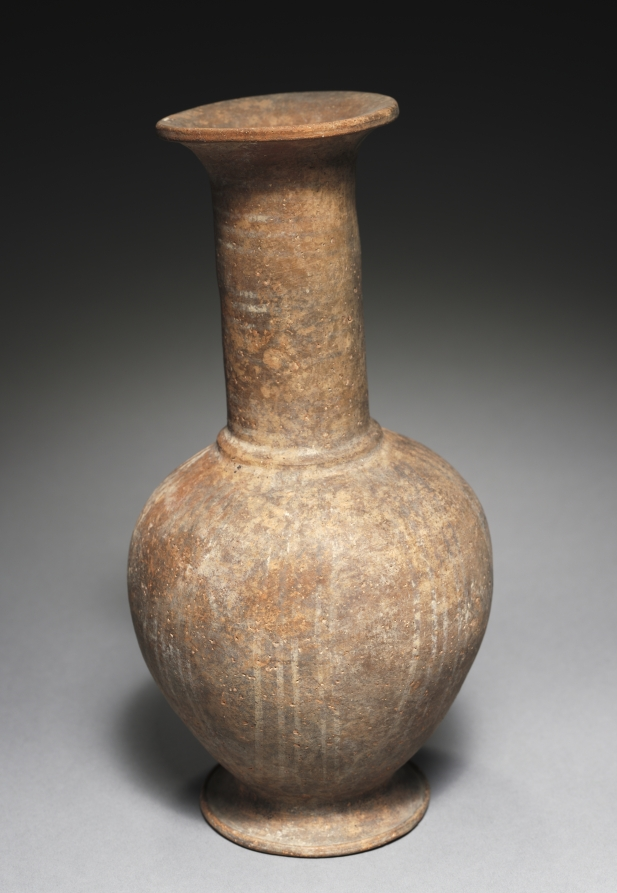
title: Jug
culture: Cyprus, late Cypriot II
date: c. 1450–1200 BCE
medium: base-ring ware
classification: Ceramic